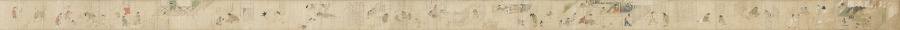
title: The Story of Fukutomi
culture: Japan, Muromachi period (1392–1573)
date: mid-1400s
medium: Handscroll; ink and color on paper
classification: Painting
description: This handscroll shows the second half of an odd tale in which a ne’er-do-well seeks the path to quick fortune and learns the art of musical flatulence. Prior to a major performance, a mentor (and competitor) advises him to consume morning glory seeds, a laxative. Thus, while performing he fouls himself and ends his days in humiliation. The audacious nature of this story and its presentation—well-animated figures with dialogue adjacent to the appropriate moments of action—create a primitive graphic novel. Japanese visual humor about farting preceded this story, but the satirical, mean-spirited twist in this tale suggests its intent was not merely to be humorous. The story was likely commissioned by court officials who disapproved of common performers rising to high positions, outflanking what was the accepted social order.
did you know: This scroll is treasured as the second oldest surviving version of this story.